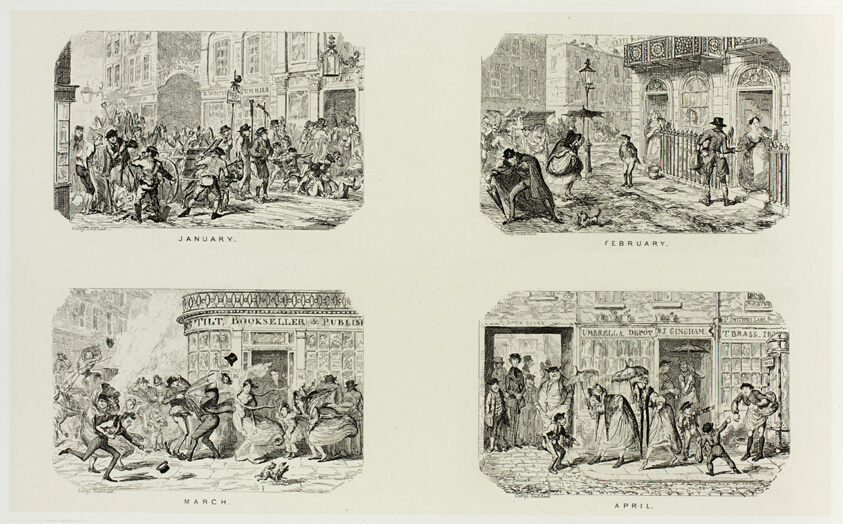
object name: Print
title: January from George Cruikshank's Steel Etchings to The Comic Almanacks: 1835-1853 (top left)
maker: George Cruikshank (English, 1792-1878); published by Pickering & Chatto (English, 19th century)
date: 1835, printed c. 1880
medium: Four steel etchings in black on cream India paper, laid down on off-white card (chine collé)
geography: England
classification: etching; paper; print; prints and drawing